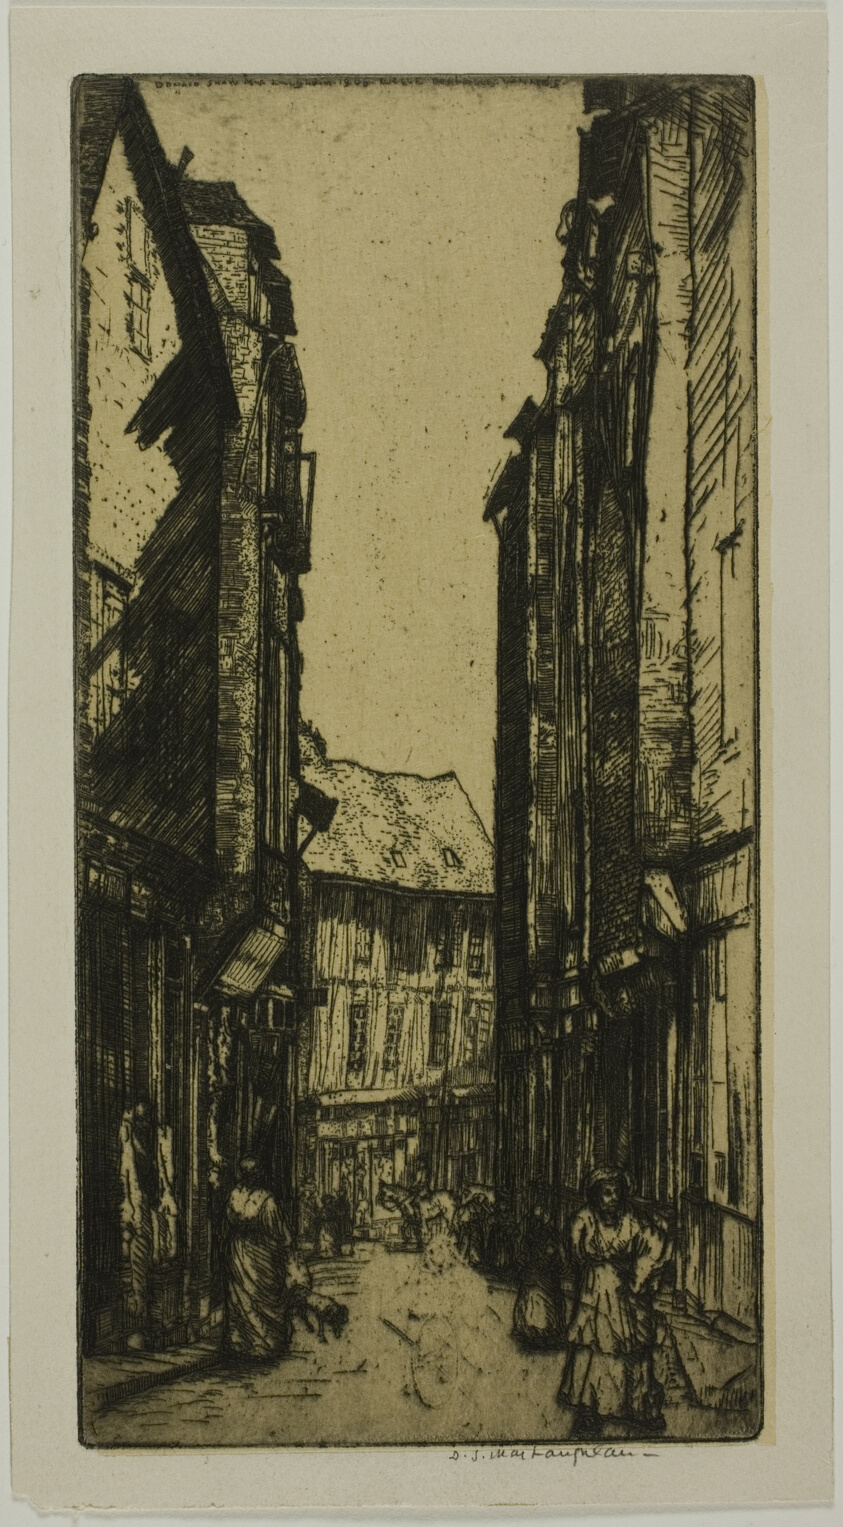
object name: Print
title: Rue des Halles, Vannes, Brittany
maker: Donald Shaw MacLaughlan (American, born Canada, 1876-1938)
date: 1906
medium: Etching in black on buff wove paper, laid down on cream wove paper (chine collé)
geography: United States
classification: etching; print; prints and drawing